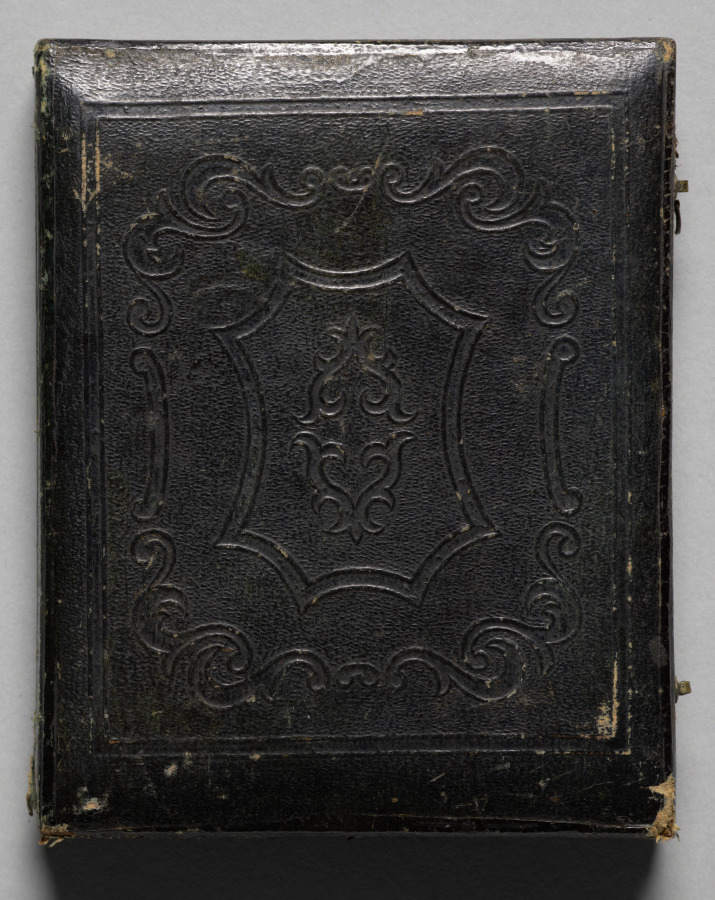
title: The Map Maker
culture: America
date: c. 1843–45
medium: daguerreotype, quarter plate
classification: Photograph